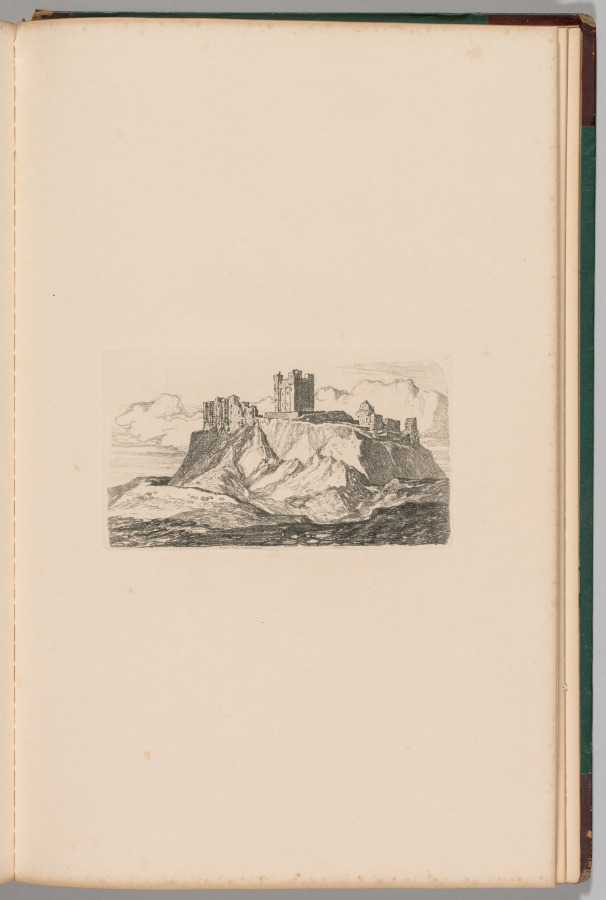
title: Liber Studiorum: Plate 30, Bambro' Castle, Northumberland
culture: England, 19th century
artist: John Sell Cotman (British, 1782–1842)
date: 1838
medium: softground etching, from a bound volume containing 48 plates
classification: Bound Volume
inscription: In plate, within image, upper right: 30; in plate, below image: Bambro' Castle, Northumberland JS Cotman